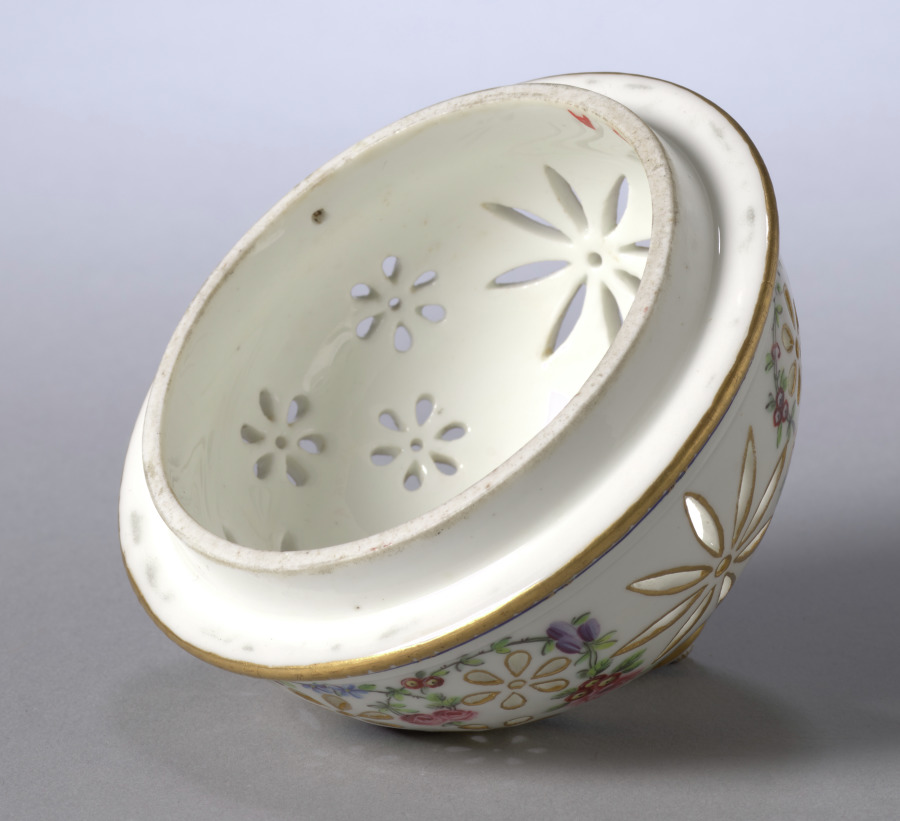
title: Sponge Box (cover)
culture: France, Sèvres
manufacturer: Sèvres Porcelain Factory (French, est. 1756)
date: c. 1769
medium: soft-paste porcelain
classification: Ceramic